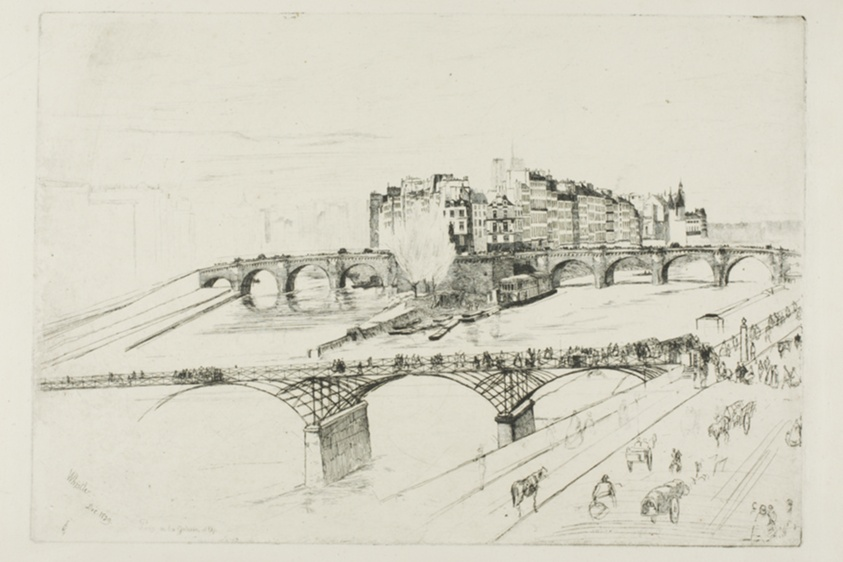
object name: Print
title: Isle de la Cité, Paris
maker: James McNeill Whistler (American, 1834-1903)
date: 1859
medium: Etching and drypoint in black ink on ivory wove paper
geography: United States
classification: etching; print; prints and drawing; paper; drypoint